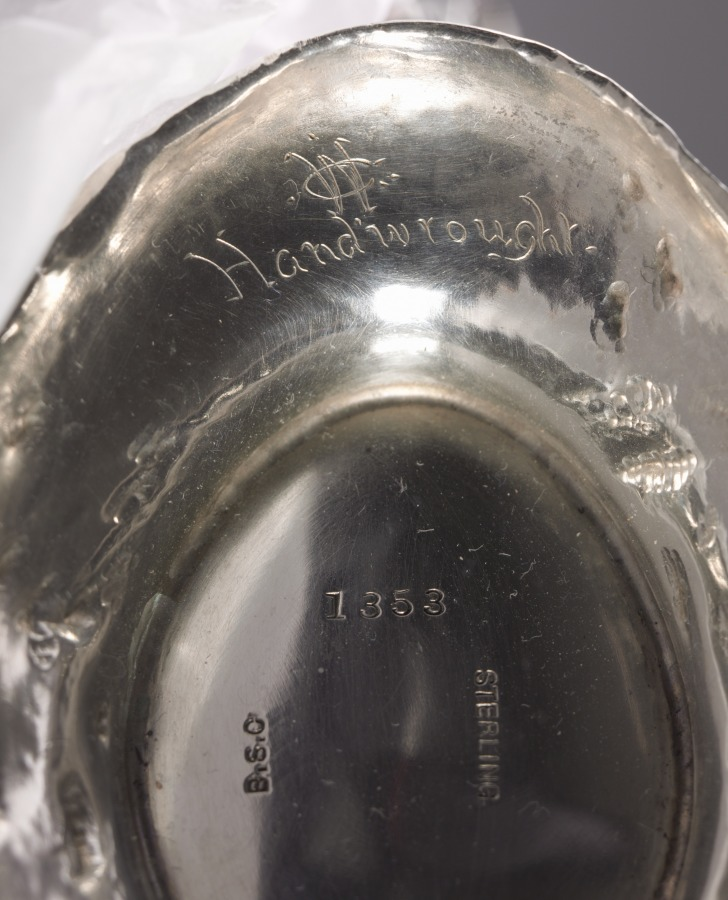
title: Sauce Boats and Trays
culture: America, Rhode Island, 19th century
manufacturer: Barbour Silver Company (American)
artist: attributed to William Christmas Codman (British, 1839–1921)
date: c. 1890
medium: silver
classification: Silver